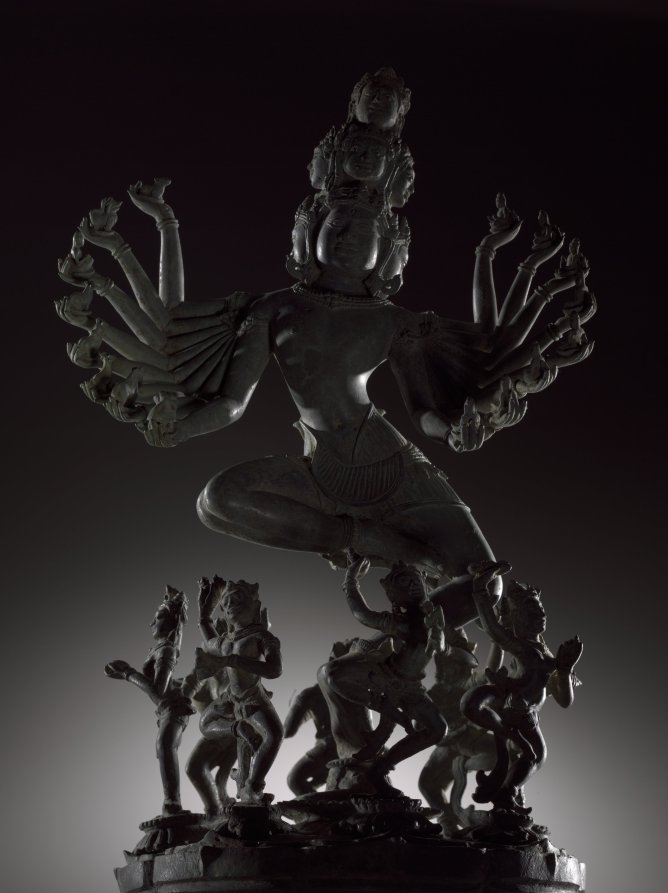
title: Hevajra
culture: Northeastern Thailand, former kingdom of Angkor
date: c. 1200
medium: Bronze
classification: Sculpture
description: Hevajra was an important figure signaling the practice of Buddhist rituals. King Jayavarman VII placed particular emphasis on Hevajra during consecration rituals and set up a colossal stone sculpture of dancing Hevajra at the east gate of his fortified city in the Khmer capital at Angkor. In the Cambodia of Jayavarman VII, tantric Buddhism became public and widespread, practiced together with other more mainstream forms of Buddhism, Hinduism, and ancestor worship. The iconography of Hevajra is described in detail in a text that bears his name, the Hevajra-tantra, first composed in India probably in the 800s. Hevajra has eight heads, sixteen arms, and four legs. His left hands hold images of Indic gods; wealth, death, sun, moon, fire, wind, water, and earth. In his right hands are animals: bull, lion, human, cat, camel, sheep, horse, and elephant. They all sit in skull cups, objects also used in tantric rituals. He dances on a corpse that embodies ignorance and is surrounded by eight yoginis who dance triumphantly in a ring around him. Yoginis functioned as intercessors between human practitioners and enlightened beings. Many bronze images of Hevajra were made during the reign of Jayavarman VII, but few survive in as pristine condition as this example. According to scientific analysis and curatorial reports, this sculpture survived in a clay vessel submerged in water, which accounts for its high tin content and unusual gray patina. Samples from the clay core reveal the presence of the mineral feldspar, a characteristic of clay from the Isaan plateau, on the other side of the mountain range not far from Banteay Chhmar, in present-day Thailand.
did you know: Hevajra, the Tantric Buddhist deity who personifies Enlightenment, dances vigorously to symbolize the human soul's liberation from the snare of existence.